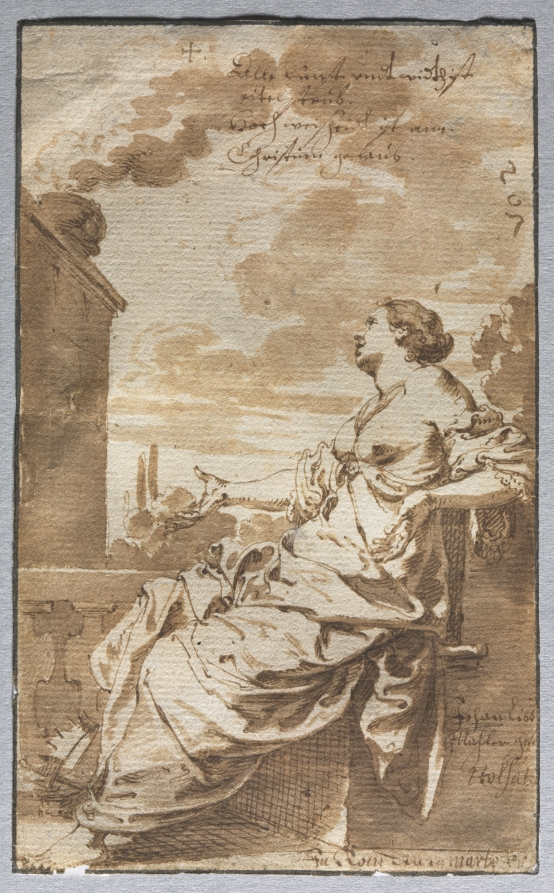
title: Allegory of Christian Belief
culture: Germany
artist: Johann Liss (German, c. 1597–1631)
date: c. 1622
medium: pen and brown ink and brush and brown wash; framing lines in pen and black ink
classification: Drawing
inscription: signed, lower right, in brown ink: Johan Liss / Mahler [illegible] / Holsati[a][masked] ; by artist, upper right, in brown ink: Alle Kunst undt widtz ist / eitel staub. / Hoch weisheidt ist ann. / Christum gelaub. ; by artist, lower right, in brown ink: Zu Rom den 19 martis Ao ["o" in superscript] 16[illegible, final two numbers abraded] ; upper left, in brown ink: + [collector's mark?]; upper right, along right edge, in brown ink: 265 [sideways] ; VERSO, upper left, in ink: 572 ; upper right, in graphite: 69 [sideways] ; center, in graphite: No. 99 al ; lower right, in graphite: Joh. Liss. [erased] ; lower left, in graphite: mj [?] ; lower left, in graphite: T5910 ; lower left, in graphite: Jah. Lys 1570-1626 ; lower right, in graphite(?): Bo. 20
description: This exceedingly rare drawing is one of only two signed sheets by Liss, who, in spite of the brevity of his career, was one of the most important German-born painters of the 17th century. Here, faith is personified as a woman with bared breasts and bare feet, symbolic of true Christian belief: plain, pure, and without artifice. She has cast aside worldly things-a crown, scepter, and book-and gazes heavenward as smoke wafts from an urn. The long inscription indicates that the sheet is from an album amicorum, or friendship book, in which drawings, poems, and autographs were collected as souvenirs of acquaintanceships. Liss may have made the drawing to dazzle an influential recipient with his inventive interpretation of a traditional religious subject.